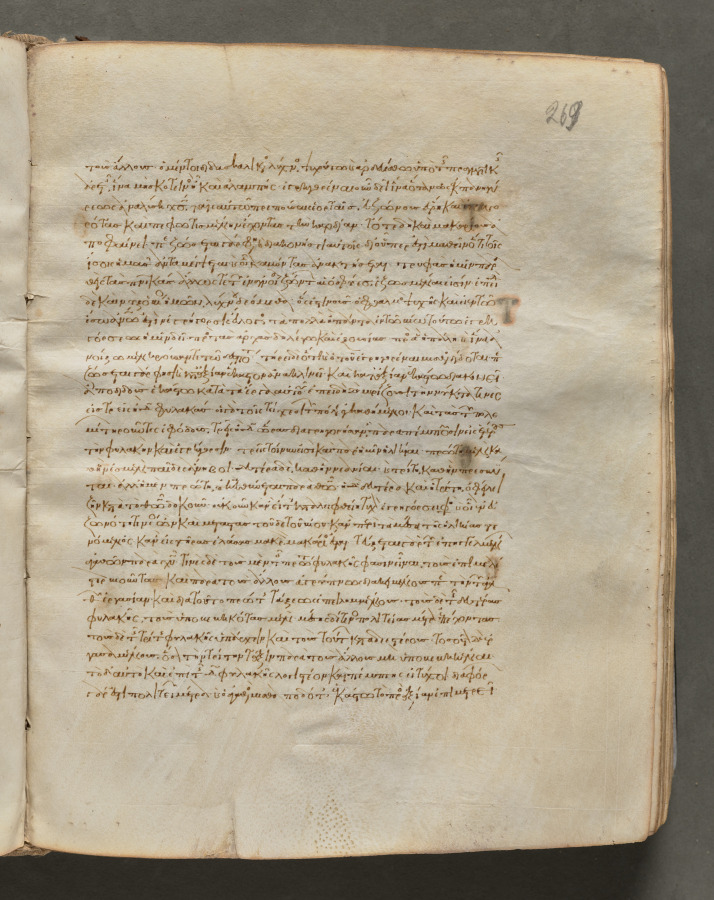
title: Text, folio 269 (recto), from a Gospel Book with Commentaries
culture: Byzantium, Constantinople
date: c. 1000–1100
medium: ink, tempera, and gold on vellum; leather binding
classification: Bound Volume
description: Each of the four gospels in this book opens on a page with brilliantly illuminated borders depicting the author of the text as well as birds—principally peacocks, symbols of the immortality of the soul—and fountains, representing the fountain of life and the salvation of the soul. This volume consists of 428 leaves with texts in Greek. Its level of sophistication suggests that it was probably written and decorated in a monastery in Constantinople.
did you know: Gospel books were carried in procession through Byzantine churches.